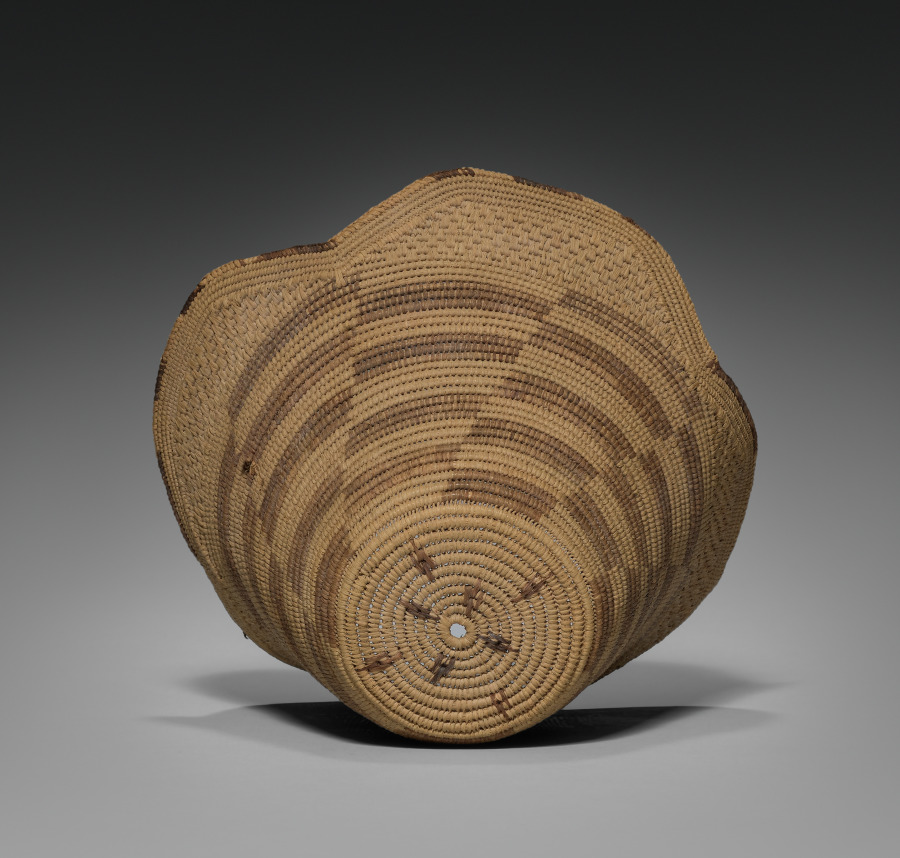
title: Hat (laket)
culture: Africa, Central Africa, Democratic Republic of the Congo, Kuba-style maker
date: early 1900s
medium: Raffia and dye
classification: Garment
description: Titled Kuba men and prominent women wear the laket, a small ornate dome-shaped hat. An essential fashion item of adult men in good social standing, it focuses special attention on the head as a significant marker of individual identity, ethnic affiliation, status, and role in society. This prestige object is secured on the crown of the head with a nine-and-a-half-inch metal pin that pierces through the hat onto a clump of hair. The laket is made from raffia palm fiber coiled into threads and woven in two alternating patterns and contrasting light and dark (dyed) wefts. There are two examples of the laket: the plain type with the flat top, and the more elaborate type called the laket mishiing.